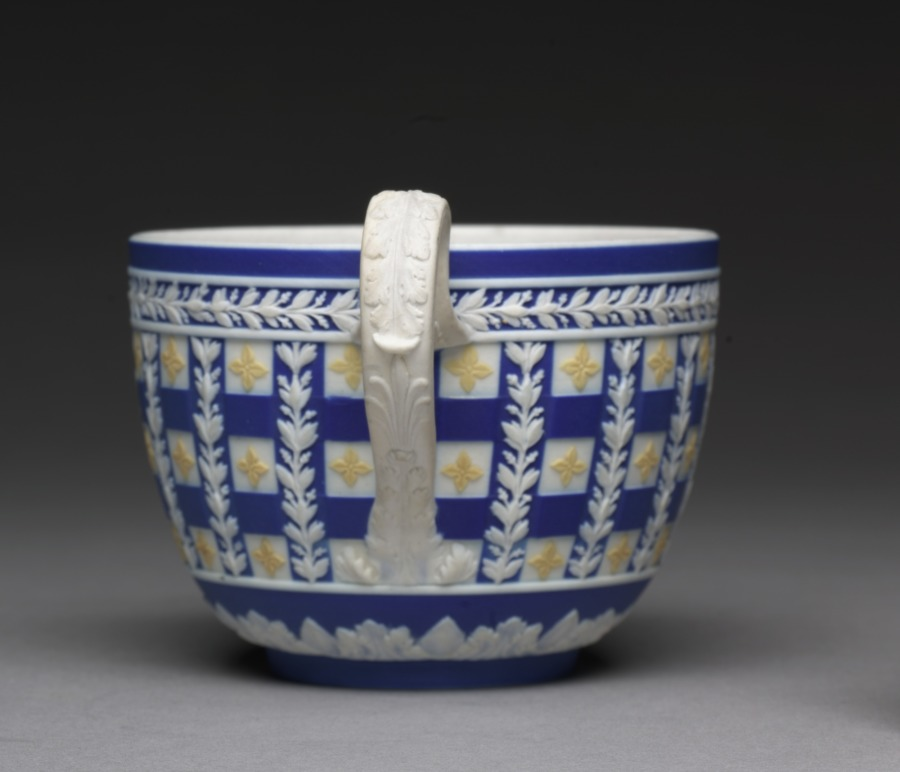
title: Cup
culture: England, Staffordshire, 18th century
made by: Wedgwood Factory (British)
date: c. 1784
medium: jasper ware with relief decoration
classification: Ceramic